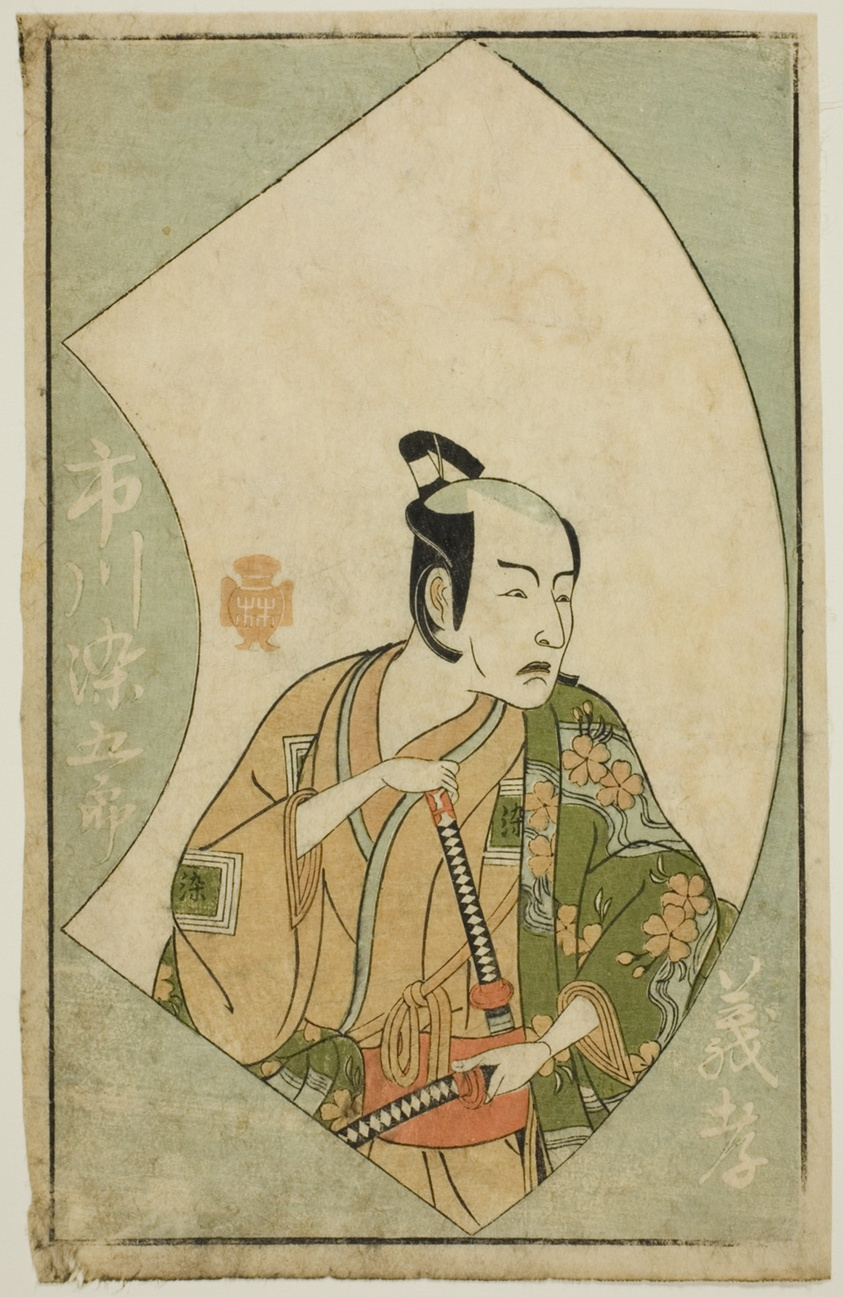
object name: Print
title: The Actor Ichikawa Somegoro, from "A Picture Book of Stage Fans (Ehon butai ogi)"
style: Japanese (culture or style)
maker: Katsukawa Shunsho 勝川 春章; Japanese, 1726-1792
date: 1770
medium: Color woodblock print; page from illustrated book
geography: Japan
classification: woodblock print; print; asian art